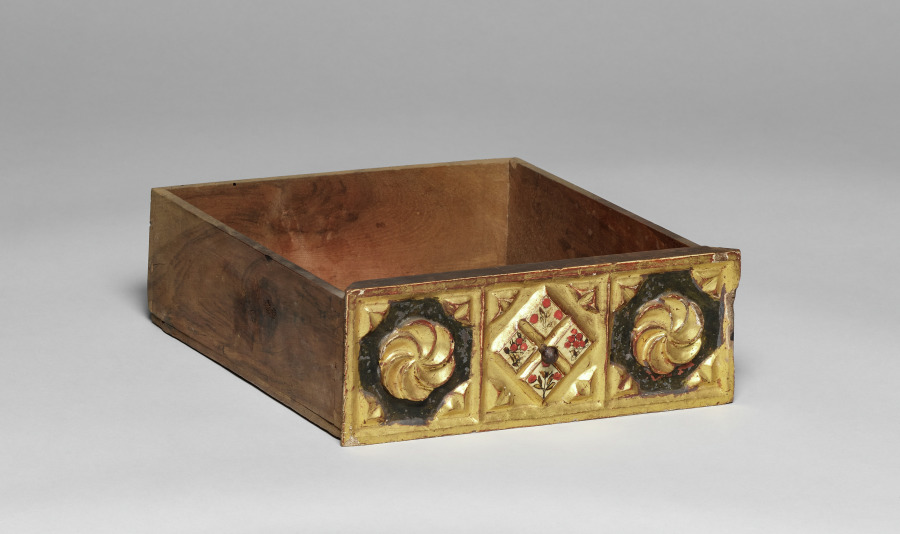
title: Chest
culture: Spain, Colonial, late 17th Century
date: late 1600s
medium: turned and joined wood, gilded and painted red with applied bone columns and bone inlays, wrought iron hardward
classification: Furniture and woodwork